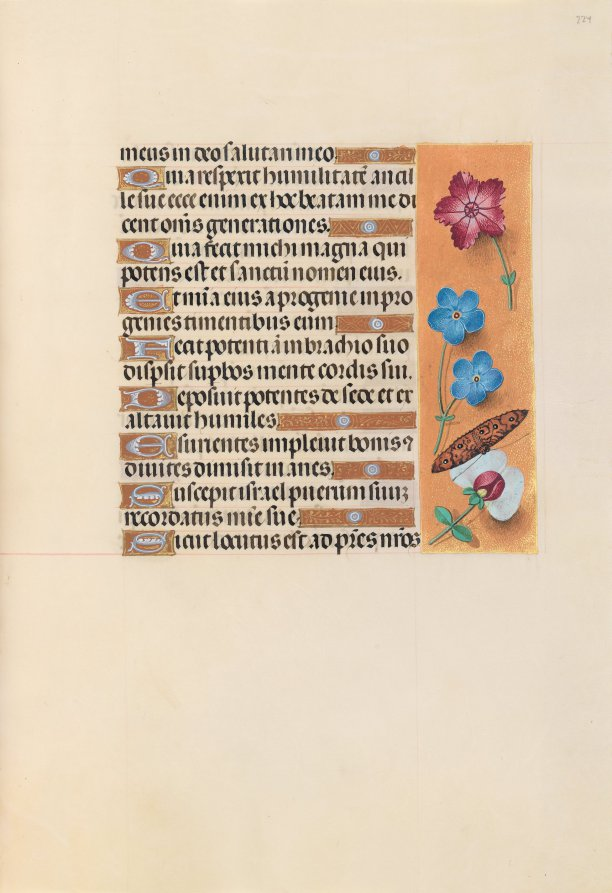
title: Hours of Queen Isabella the Catholic, Queen of Spain: Fol. 224r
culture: Flanders, Ghent and Bruges, late 15th century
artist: Master of the First Prayerbook of Maximillian (Flemish, c. 1444–1519)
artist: and Associates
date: c. 1500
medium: ink, tempera, and gold on vellum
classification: Bound Volume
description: This manuscript was illuminated by a circle of at least five highly organized manuscript painters active in the Flemish cities of Ghent and Bruges. The principal illuminator was Alexander Bening, who painted the majority of the book's miniatures. Manuscripts produced by this circle of artists are renowned for the decoration of their borders, which typically feature a rich variety of realistically-painted flowers, birds, and butterflies. This prayer book, called a book of hours, was intended not for a cleric, but for the private devotions of a lay person-in this case, Isabella the Catholic, Queen of Spain (1451-1504). Isabella's coat of arms embellishes the book's frontispiece. It is unlikely that the book was commissioned by the Queen herself; rather, she probably received it as a diplomatic gift from someone courting her patronage, perhaps Cardinal Francisco Jimenez de Cisneros. A Franciscan friar, Jimenez was dependent upon Isabella for his advancement, first to the post of Queen's confessor in 1492, and then to Archbishop of Toledo in 1495.